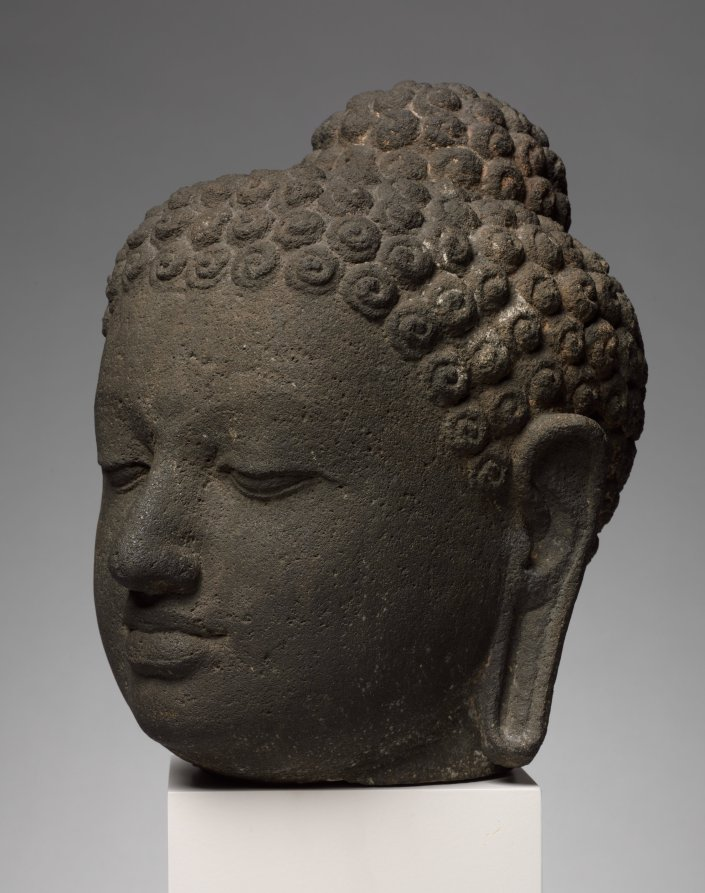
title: Head of Buddha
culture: Indonesia, Java, Borobudur, Sailendra Period, 9th Century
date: early 800s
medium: volcanic stone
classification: Sculpture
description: Serenity, tranquility, and compassion are expressively conveyed in the gently modeled, highly porous black stone of the volcanic island of Java. Borobudur, the massive, multitiered stone structure from which it came, still stands as one of the most impressive Buddhist monuments in the world. Concentric walkways with carved pilgrimage scenes lead up to vast terraces that originally had more than 500 life-size Buddha images, many of which still remain.